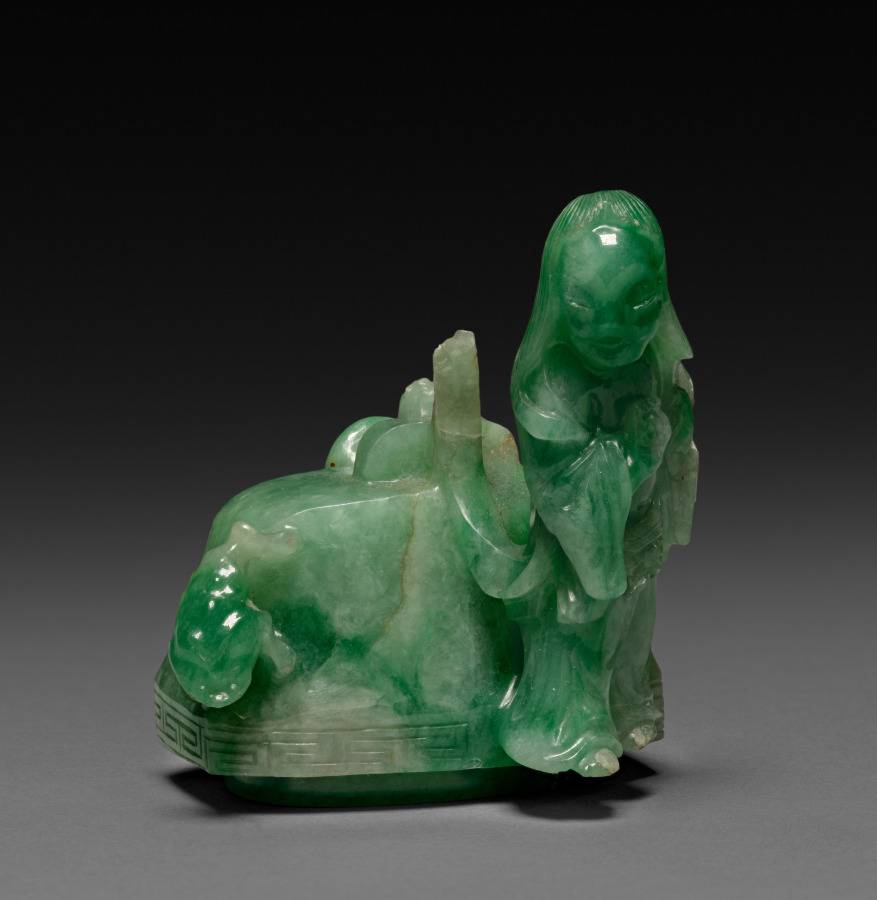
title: Three-Sectional Altar Group: Cylindrical Carving with Phoenix (lid)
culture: China, Qing dynasty (1644-1911)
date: 1644–1911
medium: jade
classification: Jade